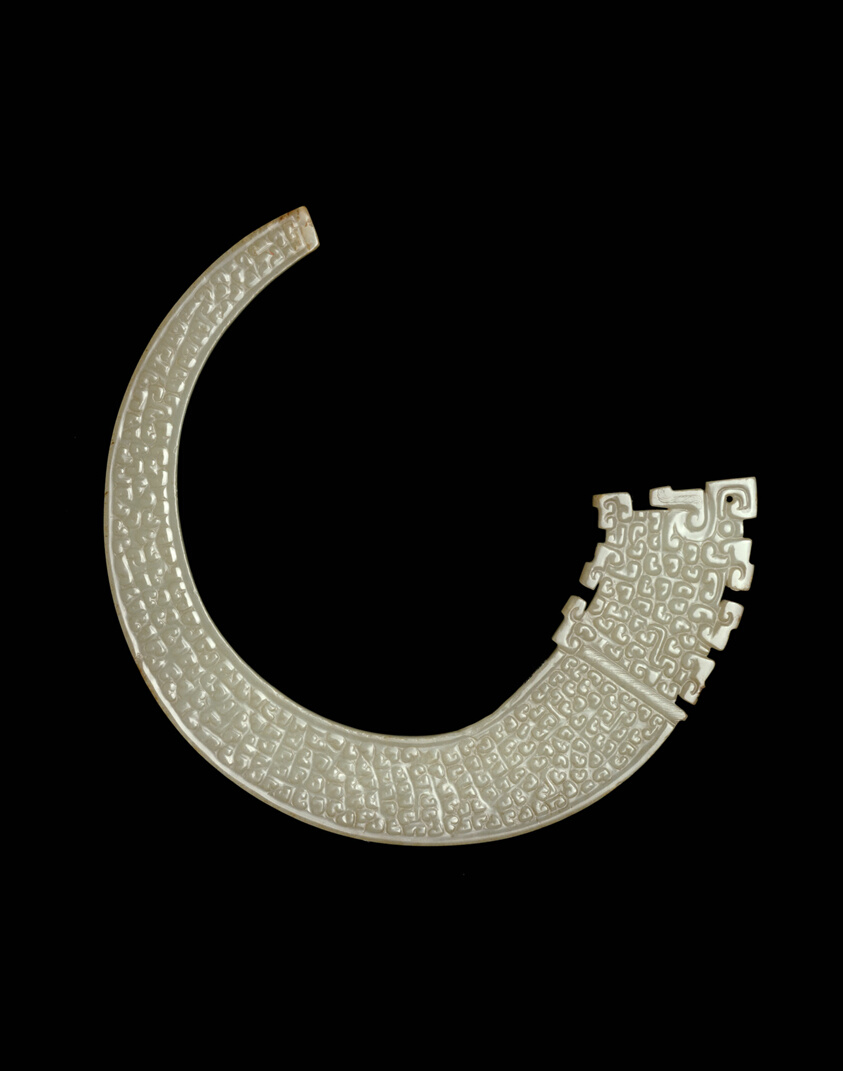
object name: Religious/Ritual Object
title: Dragon Pendant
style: Chinese (culture or style)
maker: China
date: Eastern Zhou dynasty ( c.770–256 B.C.), 6th century B.C.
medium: Jade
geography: China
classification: pendant (jewelry); jade; asian art; ritual objects